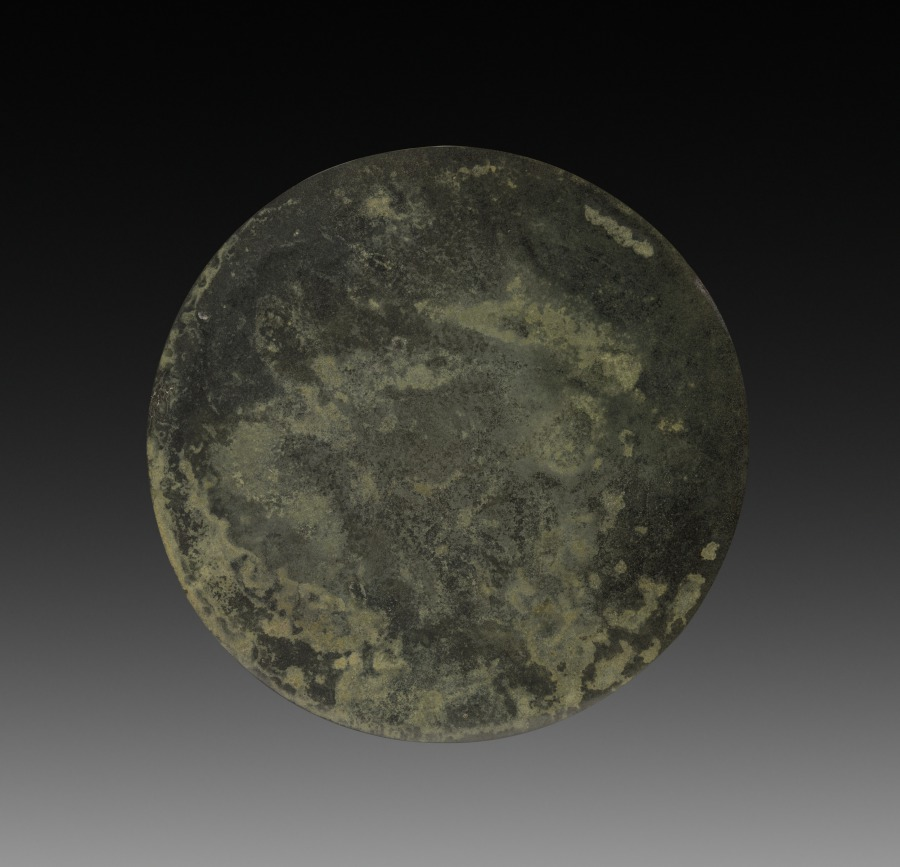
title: Mirror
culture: China, Han dynasty (202 BCE–220 CE)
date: 206 BCE–220 CE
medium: bronze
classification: Metalwork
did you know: There is high tin content in the bronze, which makes the mirror brittle.